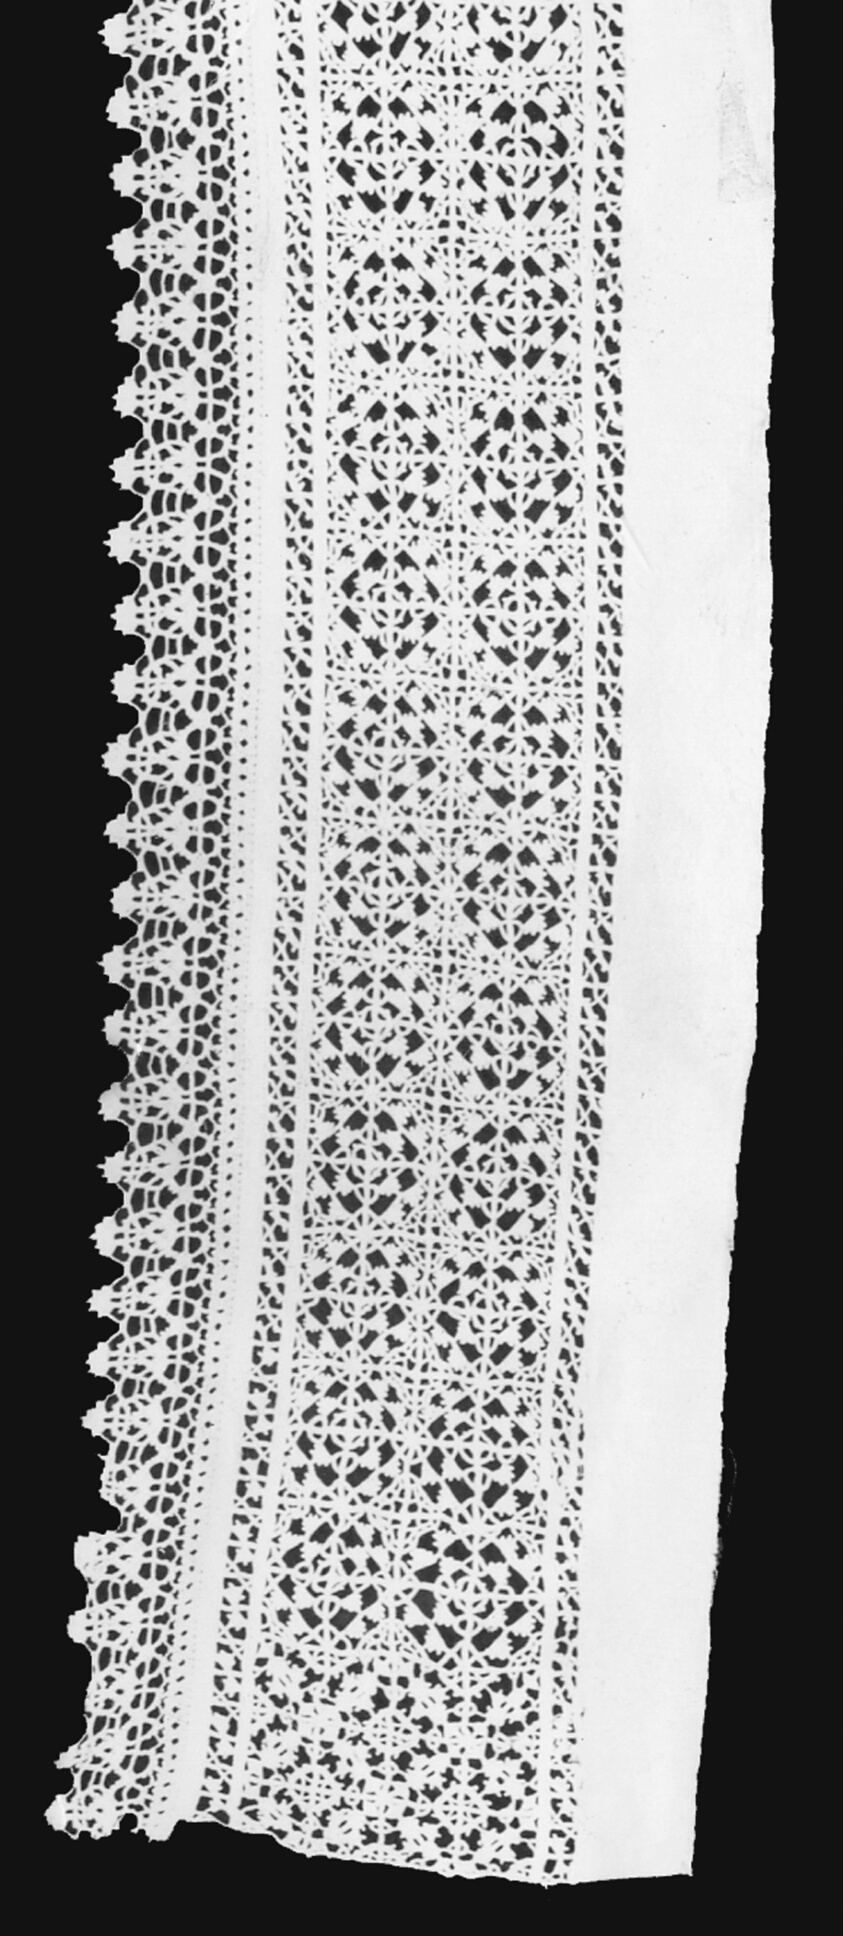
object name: Textile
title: Insertion with Edging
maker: Italy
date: 1801/1900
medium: Linen, needle lace worked on a plain weave, cut and drawn work grid; Reticella pattern; edged with bobbin straight lace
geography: Italy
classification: textile; lace - needle